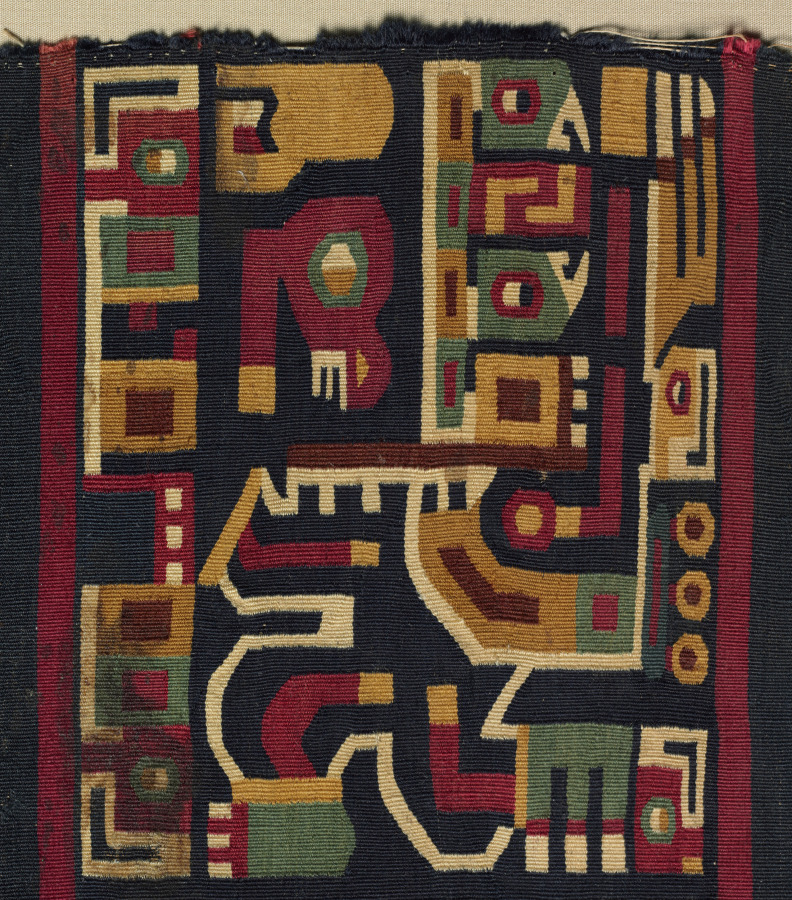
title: Tunic Fragments with Bird-Headed Creature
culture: Central Andes, Middle Horizon, Wari, 6th-11th century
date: 600–1000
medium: Camelid fiber, cotton; tapestry weave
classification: Textile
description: The bird-headed creature in profile that repeats in each of this tunic's design fields gazes upward, holds a staff of authority in front of its body, and wears an ornate headdress behind which a three-feathered wing can be seen. The extremely high technical quality of such tunics suggests that the Wari reserved bird imagery for their most exalted rulers. Here, the original incorporated more than twice as much yarn as the routine--some 19 miles, all handmade and much dyed an inky, dark blue, the most prestigious of Wari colors.